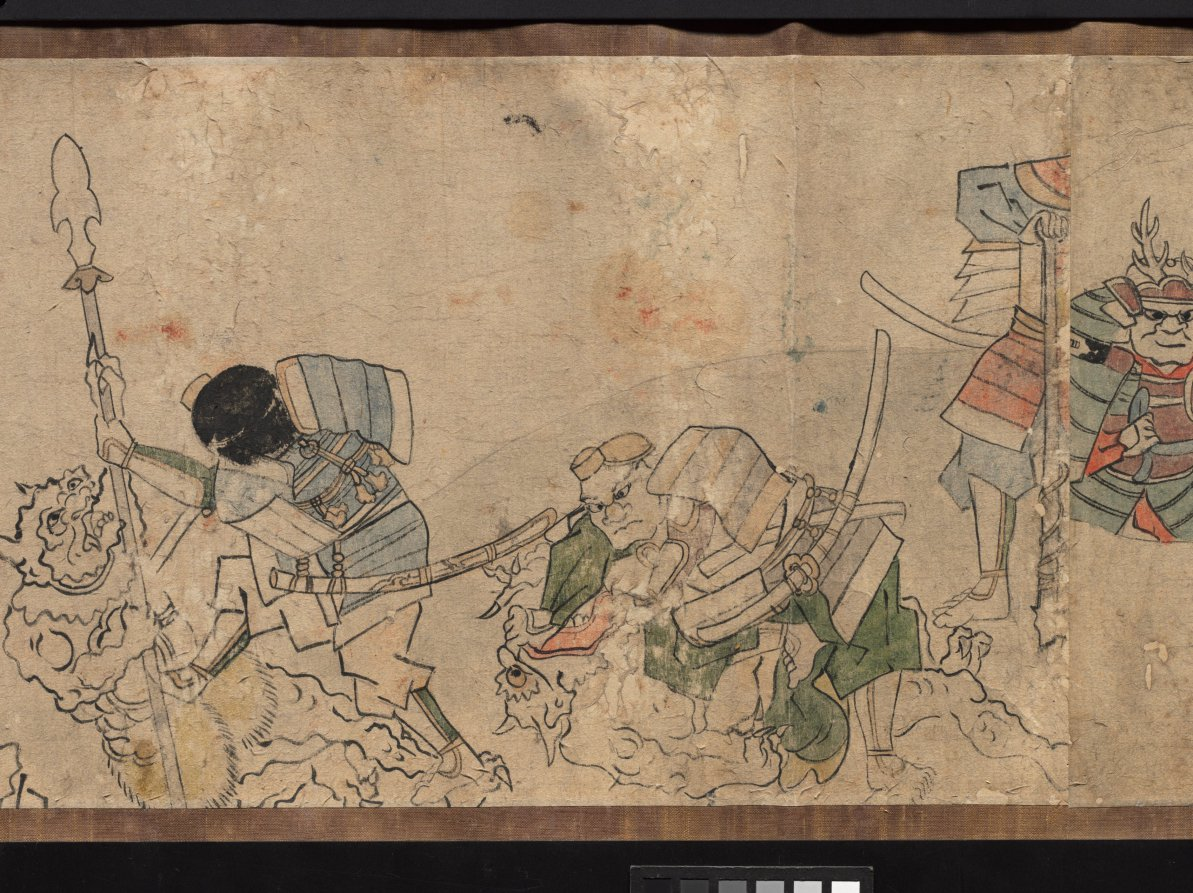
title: Oeyama Engi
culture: Japan, Edo period (1615–1868)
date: 1615–1868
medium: one of a pair of handscrolls; ink and color on paper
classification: Painting